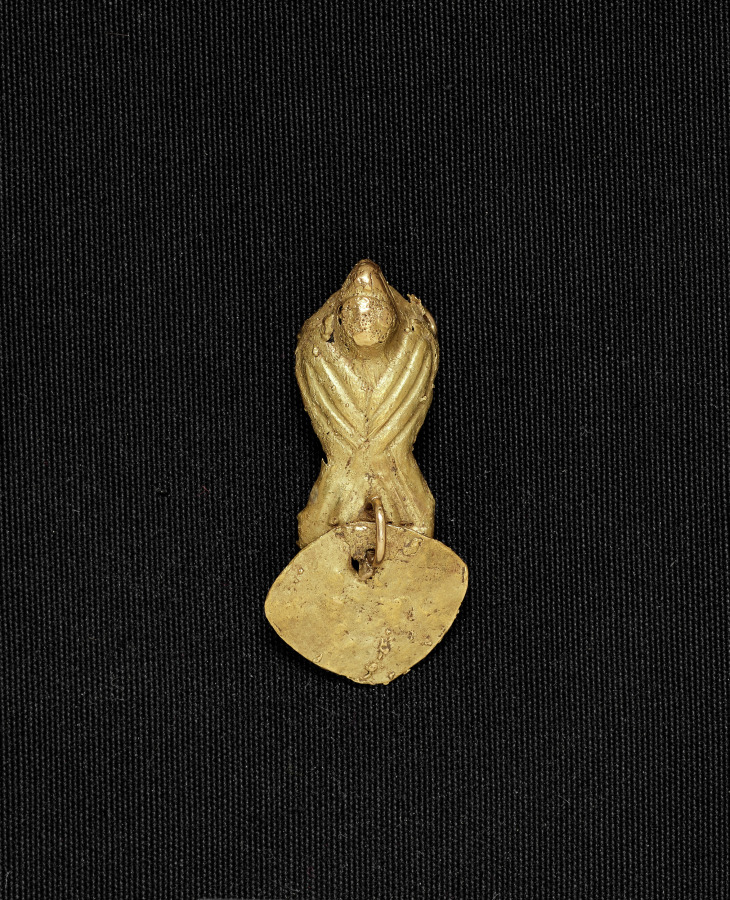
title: Bird Bead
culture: Colombia, Muisca style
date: c. 900–1550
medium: cast gold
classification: Jewelry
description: Muisca metalwork divides into two categories: ornaments to be worn, such as these, and offering figurines, in the case to the right. The elaborate bird pendant features delicate herringbone moldings, openwork patterns, and wing details-all part of the wax model from which the pendant was cast (see nearby computer animation). The dangles were attached after casting.